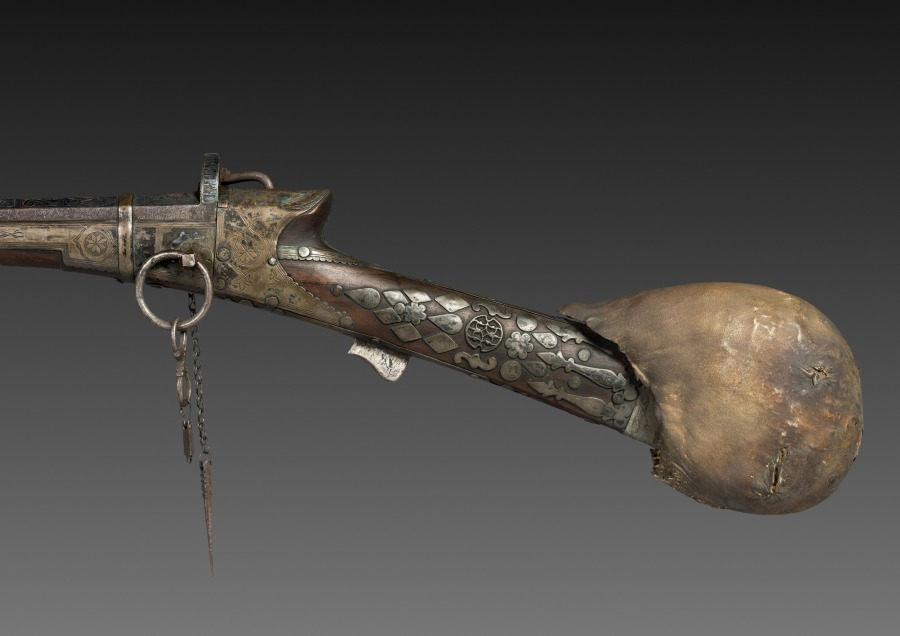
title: Matchlock Musket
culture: Turkey, Ottoman period (1299–1922)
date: c. 1750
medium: Wood, steel, brass, mother-of-pearl inlay, and leather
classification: Arms and Armor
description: Collectively, the Safavid, Mughal, and Ottoman empires are known as the Gunpowder Empires. Particularly from the 1500–1700s, they were among the strongest economic, cultural, and militaristic powers. Each trained and equipped their armies with the latest gunpowder firearms, particularly cannons and muskets. While used in battle, muskets were also used for leisure activities, particularly hunting. The decoration on this musket suggests it was a courtly item, fitted with a leather pad to protect the shooter from the force of the explosion after firing.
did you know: A matchlock musket was loaded from the muzzle end with a scouring stick kept in a sleeve on the underside of the barrel.